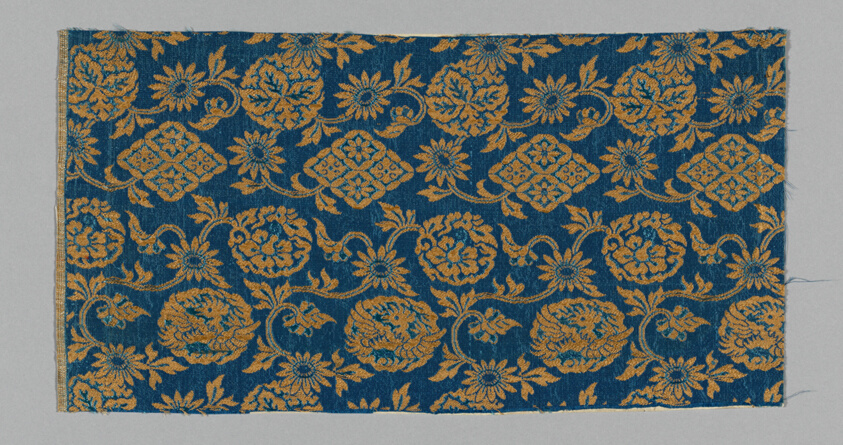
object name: Textile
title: Fragment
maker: Japan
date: Edo period (1615–1868), 1775/1825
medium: Silk and gilded paper strip, twill weave with supplementary patterning wefts bound by secondary binding warps in twill interlacings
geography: Japan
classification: textile; weaving